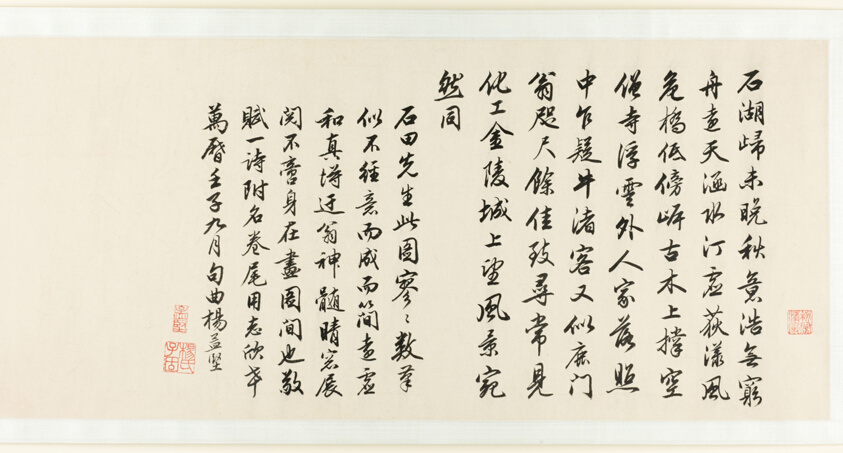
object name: Painting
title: Return to Stone Lake 石湖歸棹圖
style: Chinese (culture or style)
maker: Shen Zhou, 沈周; Chinese, 1427-1509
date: Ming dynasty (1368–1644), dated 1466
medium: Handscroll; ink on paper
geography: China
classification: handscroll; painting; asian art